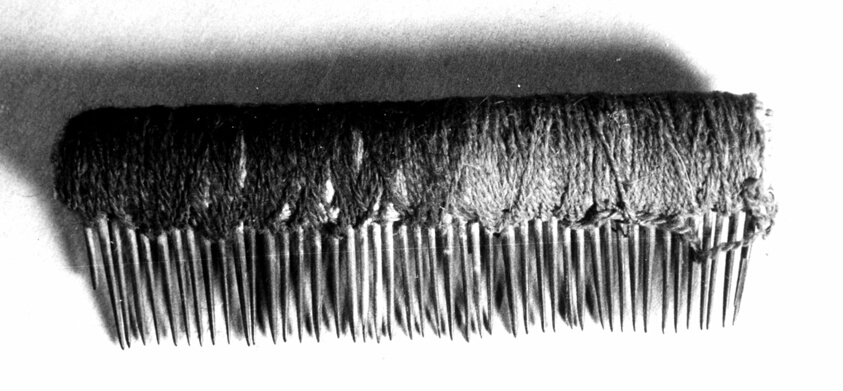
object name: Textile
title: Weaving Comb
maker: Peru, Possibly central or south coast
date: A.D. 1000/1476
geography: Peru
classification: textile; textile working equipment; weaving; accessories (object genre)